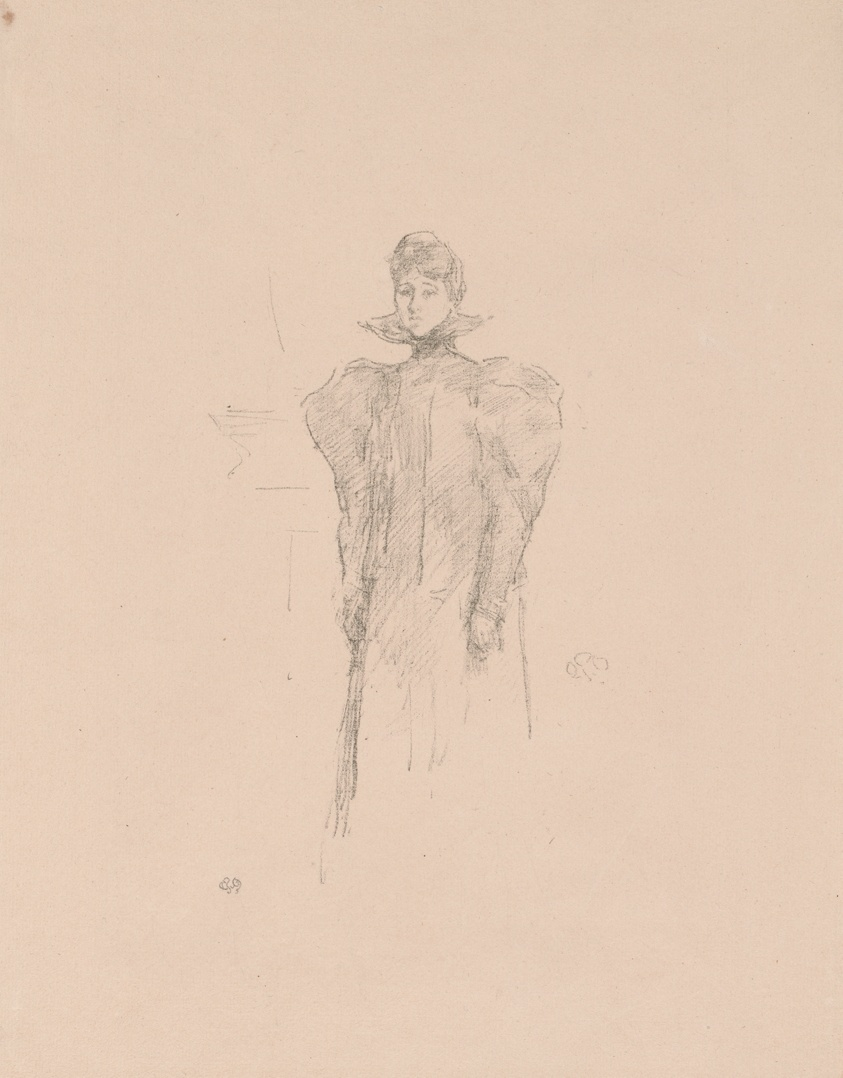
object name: Print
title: The Medici Collar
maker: James McNeill Whistler (American, 1834-1903)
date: 1897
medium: Transfer lithograph in black on buff laid paper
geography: United States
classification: transfer lithograph; lithograph; print; prints and drawing; paper